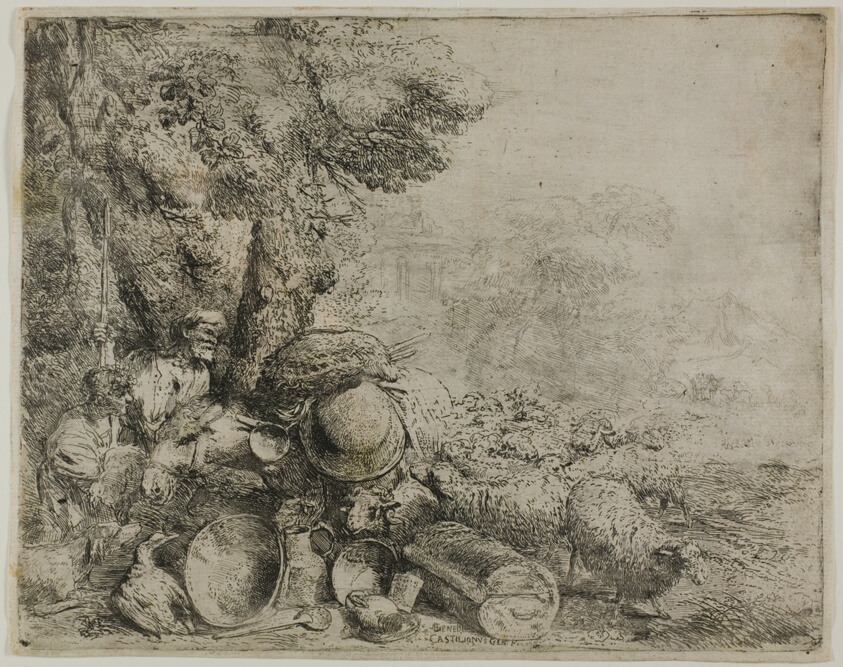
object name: Print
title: The Overloaded Donkey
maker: Giovanni Benedetto Castiglione (Italian, 1609-1664)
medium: Etching on paper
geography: Italy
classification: etching; print; prints and drawing